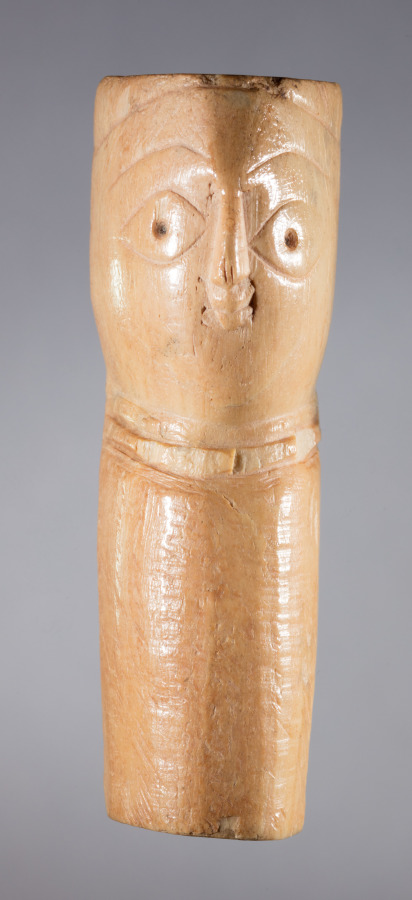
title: Figurine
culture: Iran, early Islamic period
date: 700s - 900s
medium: bone, incised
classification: Miscellaneous